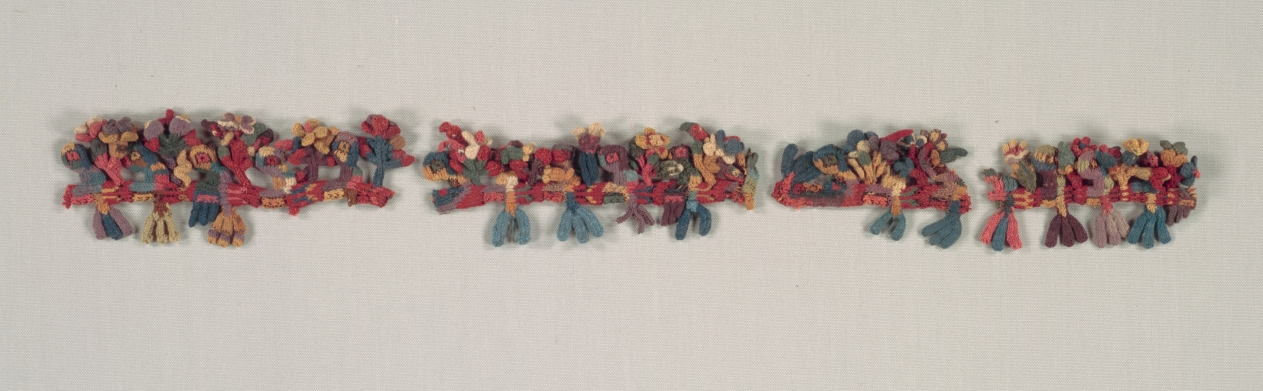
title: Border Fragment with Birds and Flowers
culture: Peru, South Coast, Nasca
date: 100 BCE–700 CE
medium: camelid fiber, cross-knit looping (reversible)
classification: Embroidery